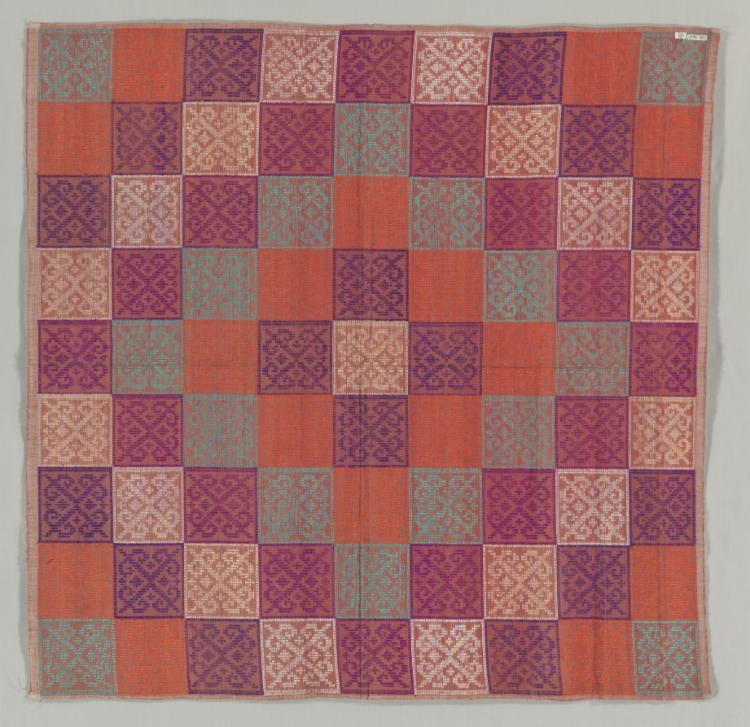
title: Headcloth (Yakan seputangan)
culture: Philippines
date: c. early 1900s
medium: plain weave with paired weft: cotton; supplementary weft: silk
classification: Garment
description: This seputangan (headcloth) was produced by the Yakan people of Basilan, and worn by men in ceremonial, formal, and dress contexts. The cloth was woven on a back-strap loom with a cotton warp and patterned using supplementary-weft silk, which produces the characteristic lustrous motifs across the surface. The vivid, high-contrast color combinations are characteristic of Yakan ceremonial textiles.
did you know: This textile’s geometric intensity recalls the Tausug pis siyabit, but is technically and culturally distinct.